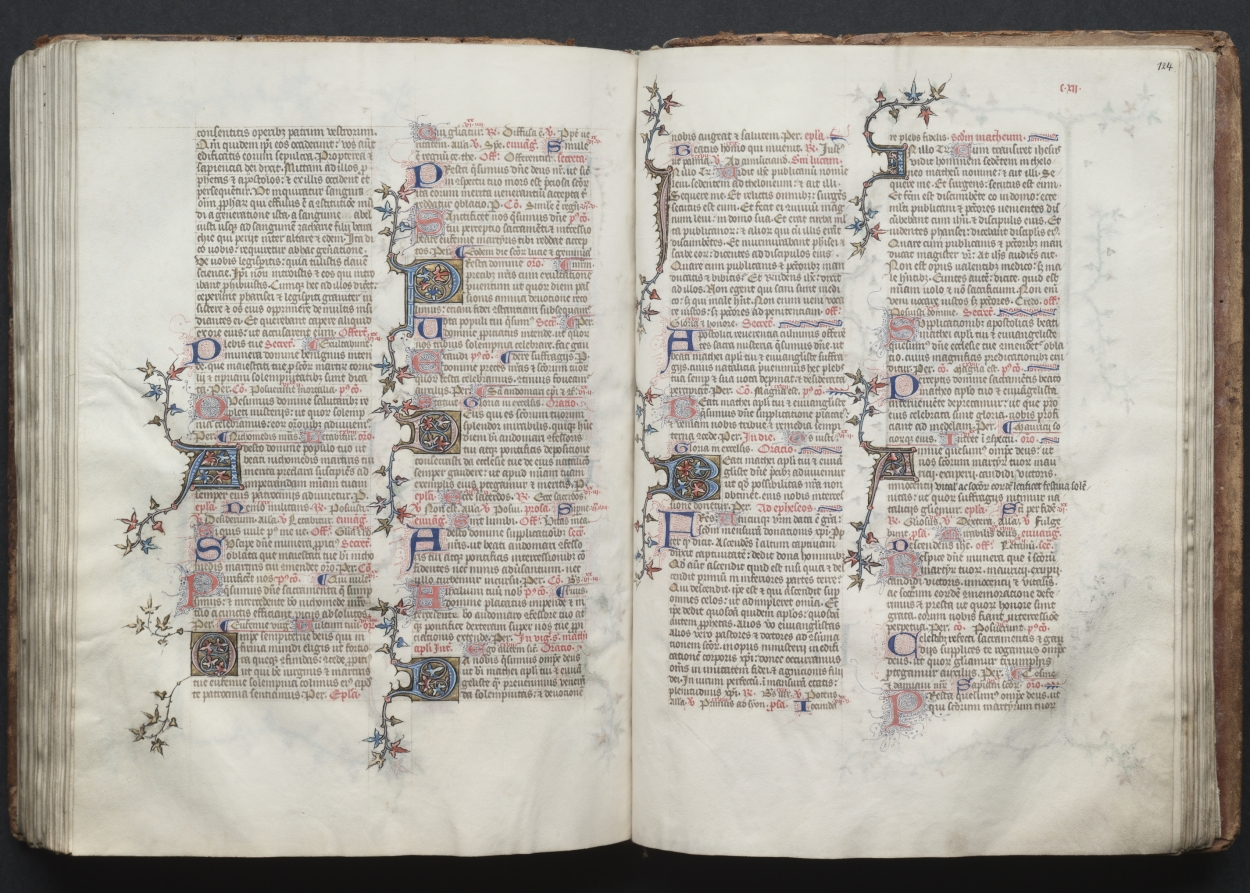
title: The Gotha Missal: Fol. 123v, Text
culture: France, Paris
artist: Master of the Boqueteaux (French)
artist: and Workshop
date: c. 1375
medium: ink, tempera, and gold on vellum; blind-tooled leather binding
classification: Bound Volume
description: The style and quality of this manuscript's decoration is typical of deluxe Parisian books made for aristocratic or royal patrons. Most of the book's decoration appears to be the work of the Master of the Boqueteaux, an artist active at the court of King Charles V (died 1380). His style was apparently shared by a number of book illuminators working in and around Paris. It is very possible that the Gotha Missal belonged to Charles V, but is not provable because the manuscript has no royal portraits and lacks a colophon. Given the book's magnificent decoration, however, it would seem that it was produced for a Valois prince, if not for the king himself. The manuscript receives its name from the German dukes of Gotha, its later owners.